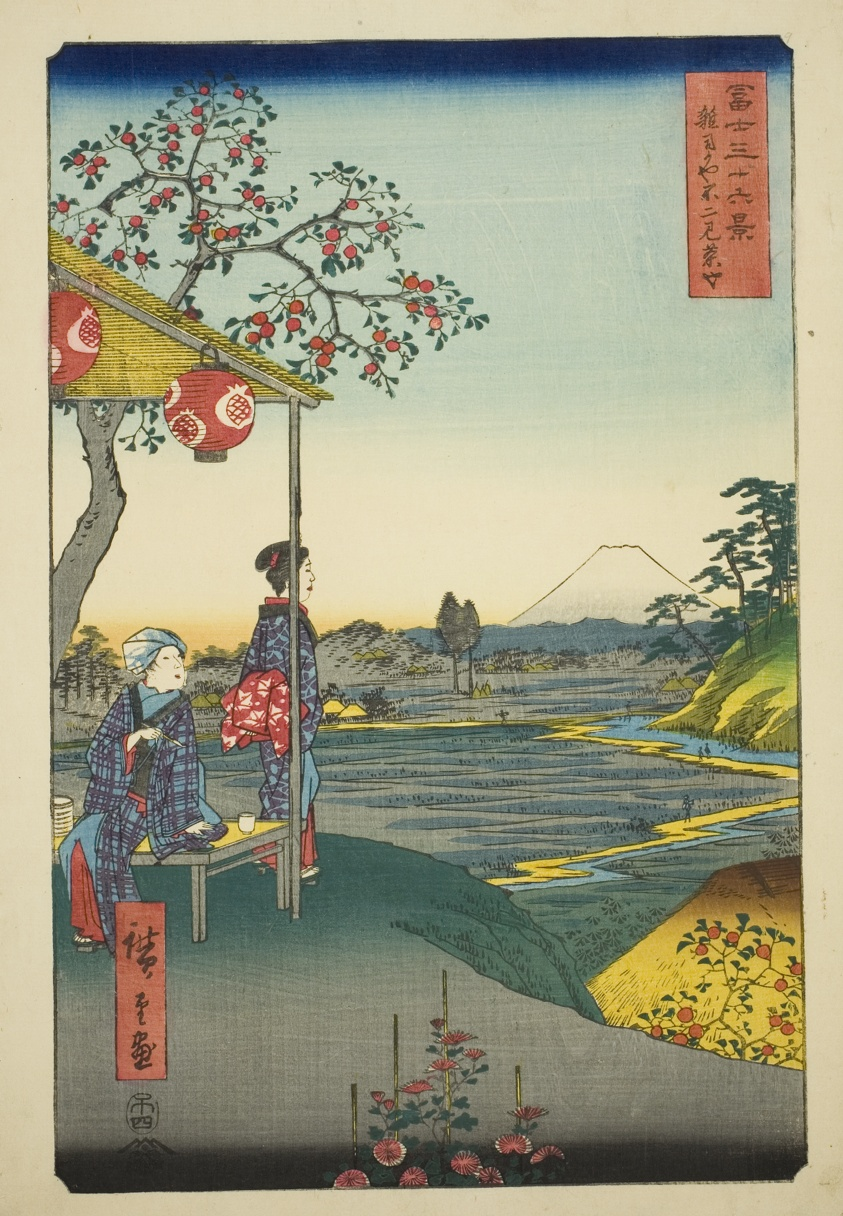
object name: Print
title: View of Mount Fuji from a Teahouse at Zoshigaya (Zoshigaya Fujimi chaya), from the series "Thirty-six Views of Mount Fuji (Fuji sanjurokkei)"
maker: Utagawa Hiroshige 歌川 広重; Japanese, 1797-1858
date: 1858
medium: Color woodblock print; oban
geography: Japan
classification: woodblock print; print; asian art